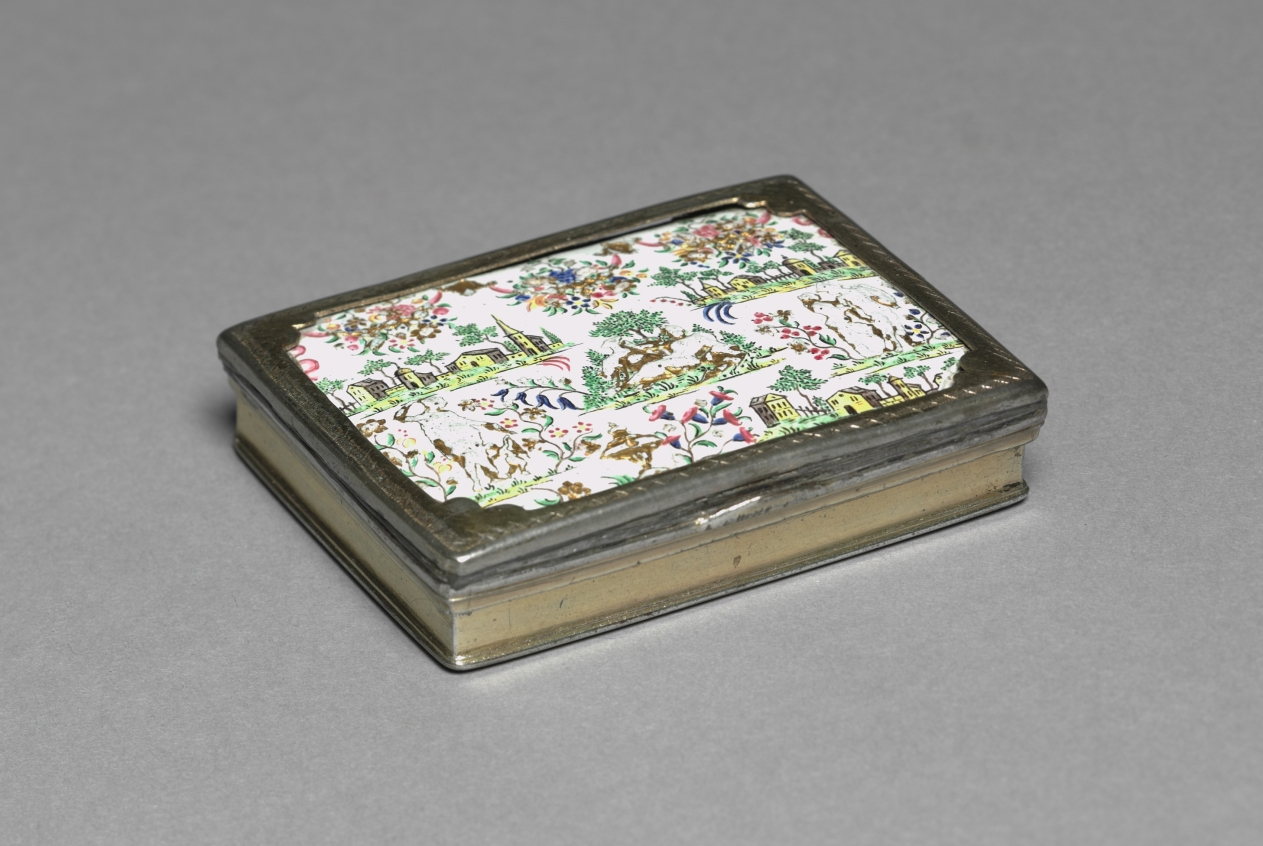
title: Box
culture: Germany, 18th century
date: c. 1730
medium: enamel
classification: Miscellaneous